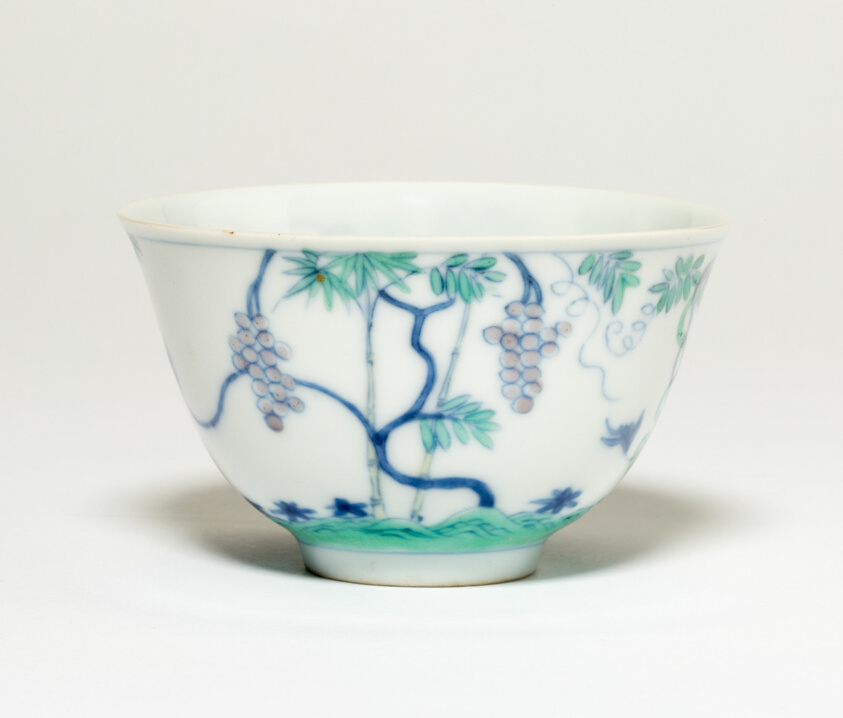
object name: Vessel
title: Cup with Fruit Trees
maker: China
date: Qing dynasty (1644–1911), late Kangxi period (1662–1722), early 18th century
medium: Porcelain painted in underglaze blue and overglaze enamels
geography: China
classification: porcelain; asian art; ceramics; vessel